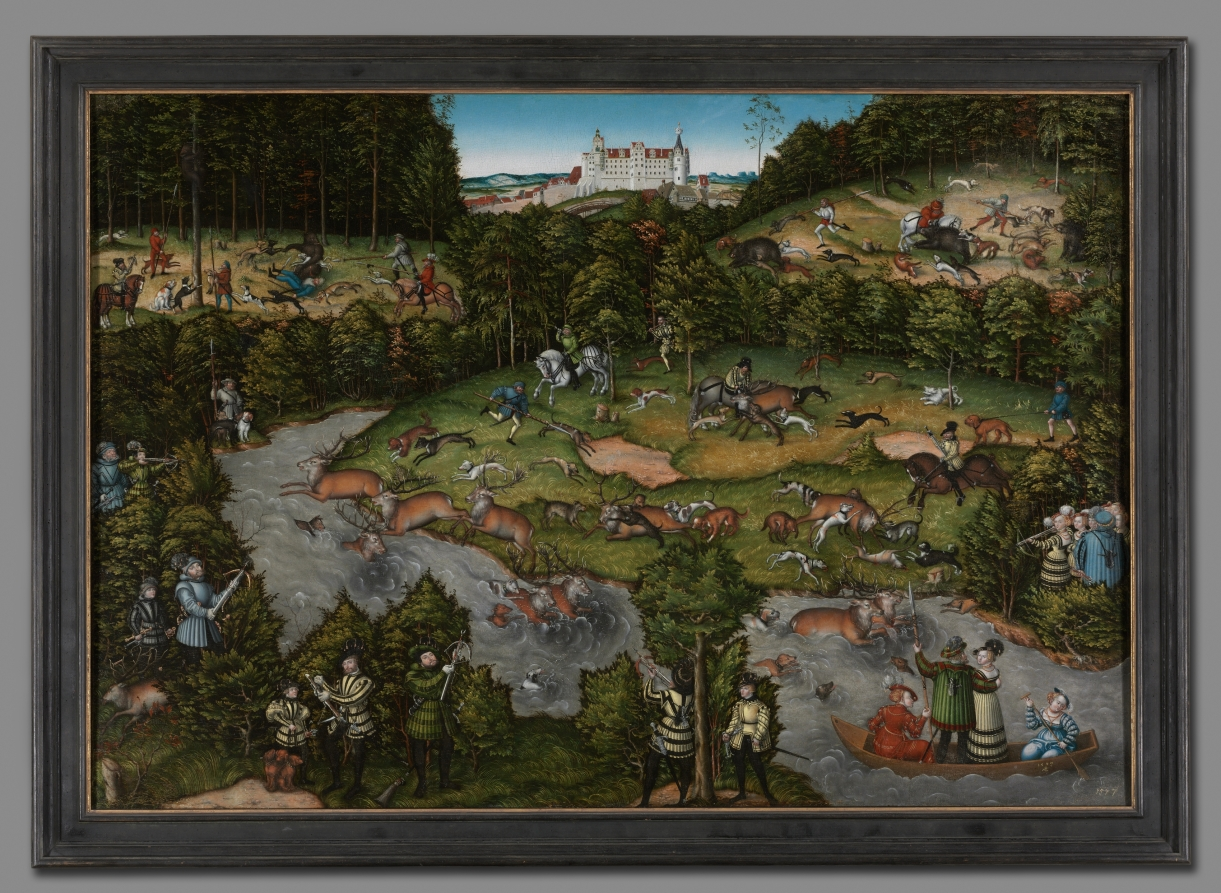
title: Hunting near Hartenfels Castle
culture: Germany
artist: Lucas Cranach (German, 1472–1553)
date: 1540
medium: oil, originally on wood, transferred to masonite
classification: Painting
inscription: Signed lower right on boat with a winged serpent, and dated: 1540 [inventory number, lower right: 1577]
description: The Protestant rulers of Saxony commissioned this animated hunt scene, set near their residence seen in the background, Hartenfels Castle (in eastern Germany). John Frederick the Magnanimous, in the bottom left corner, wears dark green hunting attire; he spans his crossbow and waits for his courtiers and dogs to chase a stag across the river. His wife, the Electress Sibylle, stands at right, poised to take the first ceremonial shot. The prince electors of Saxony were passionate practitioners of hunting with dogs—elaborate, highly rehearsed occasions, coordinated by the use of signals from hunting horns. Cranach dated this work and his signature is the winged snake at lower right. 1577 in the right corner is an inventory number.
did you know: Humans, dogs, and deer make up most of the creatures in this busy scene—but not all of them! Look closely at the background to spot a bear and three boars.